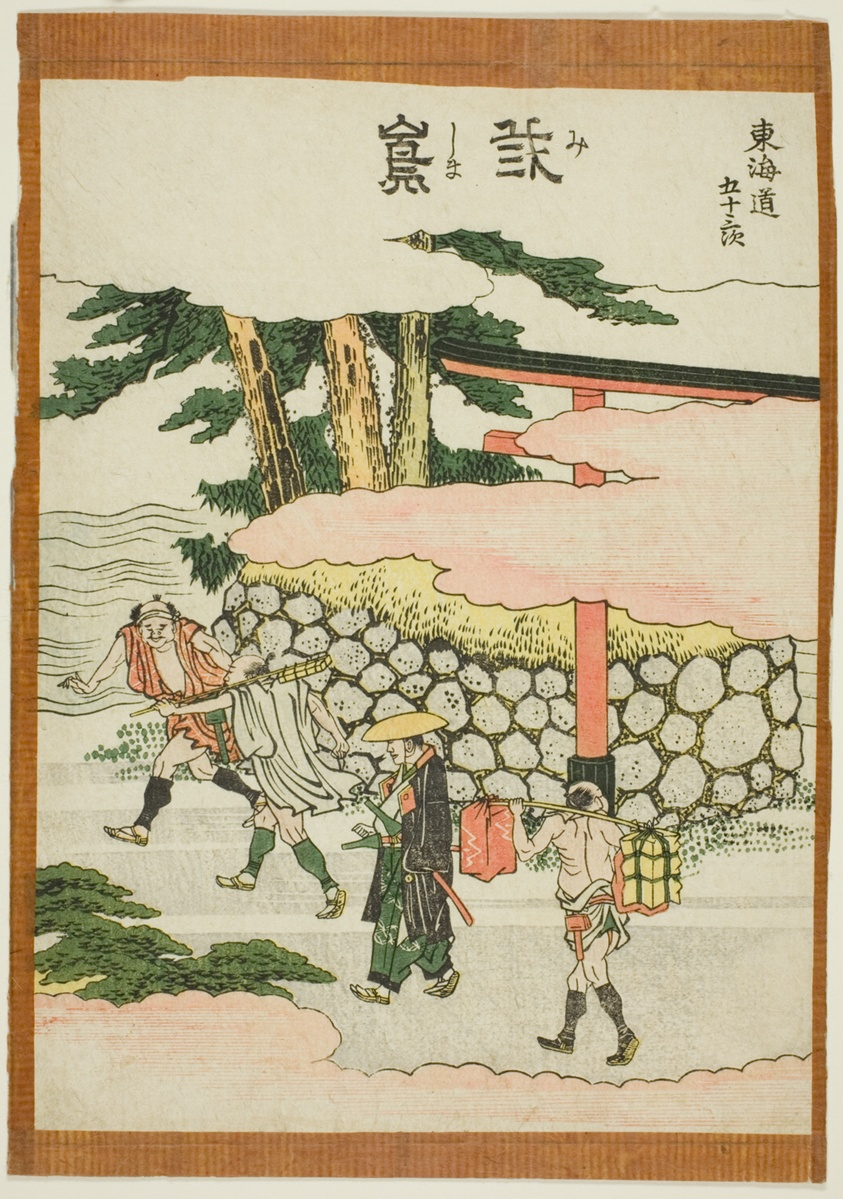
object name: Print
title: Mishima, from the series "Fifty-three Stations of the Tokaido (Tokaido gojusan tsugi)"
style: Japanese (culture or style)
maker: Katsushika Hokusai 葛飾 北斎; Japanese, 1760-1849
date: c. 1806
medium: Color woodblock print; chuban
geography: Japan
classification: woodblock print; print; asian art